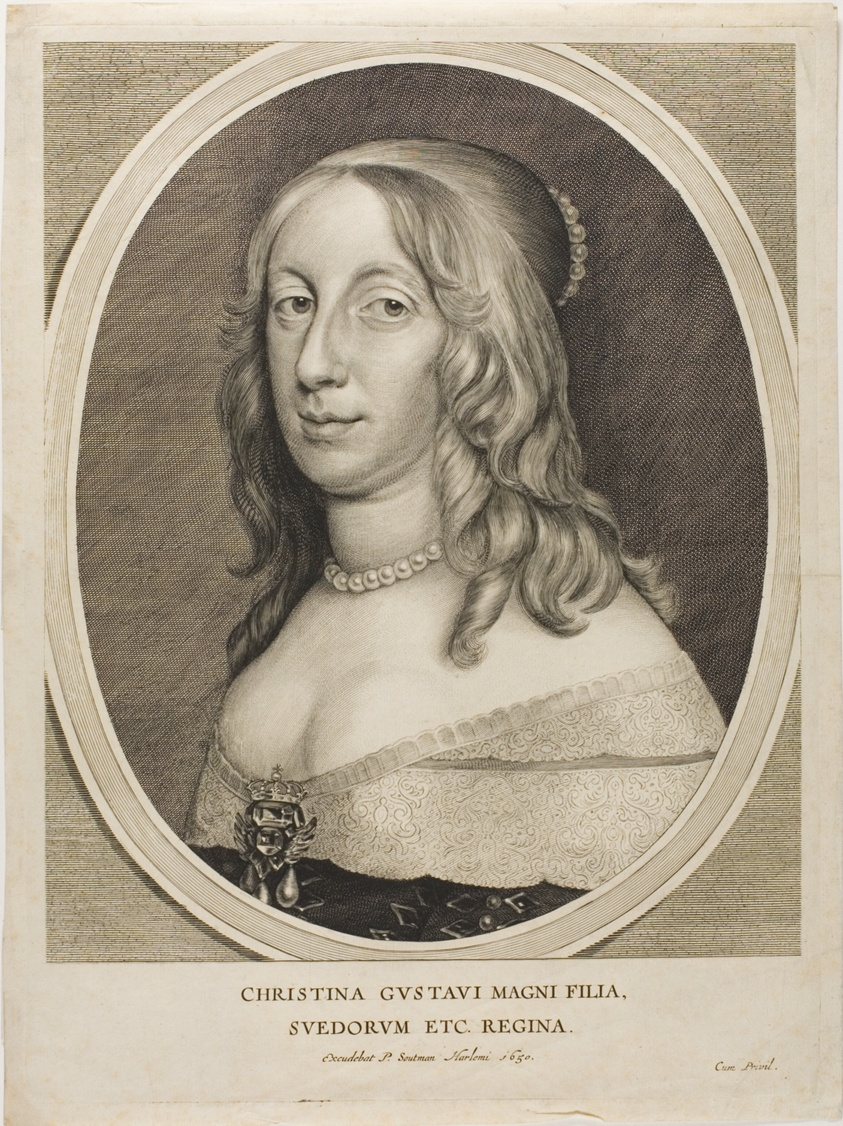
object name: Print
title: Queen Christina of Sweden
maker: Cornelis Visscher; Dutch, c. 1629-1658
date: 1650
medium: Engraving in black on ivory wove paper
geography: Holland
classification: engraving; print; prints and drawing